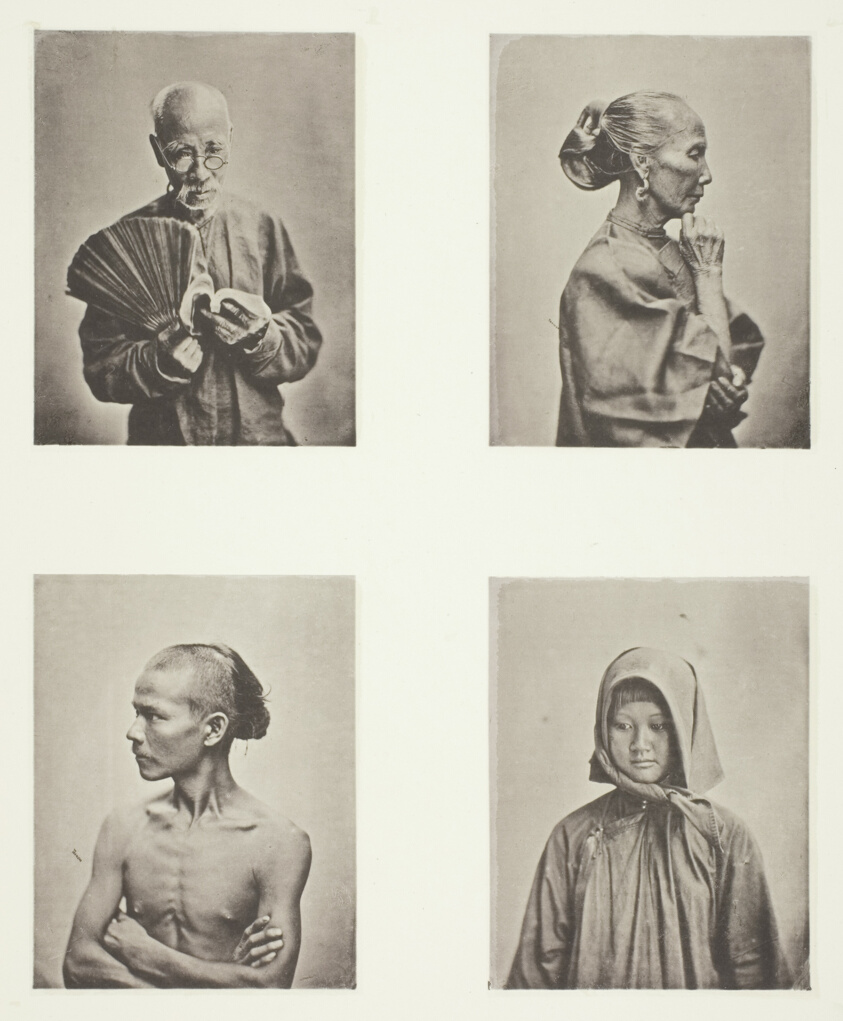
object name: Photograph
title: Four Heads, Types of the Labouring Class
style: 19th century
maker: John Thomson (Scottish, 1837–1921)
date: c. 1868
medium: Collotype, pl. XI from the album "Illustrations of China and its People, Volume I" (1873)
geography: Scotland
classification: photography; photograph